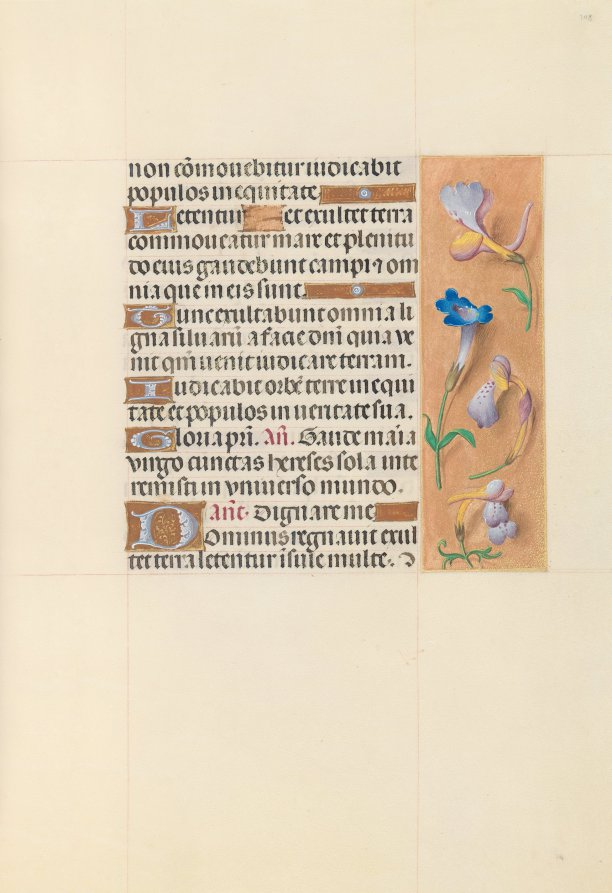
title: Hours of Queen Isabella the Catholic, Queen of Spain: Fol. 108r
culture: Flanders, Ghent and Bruges, late 15th century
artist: Master of the First Prayerbook of Maximillian (Flemish, c. 1444–1519)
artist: and Associates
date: c. 1500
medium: ink, tempera, and gold on vellum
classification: Bound Volume